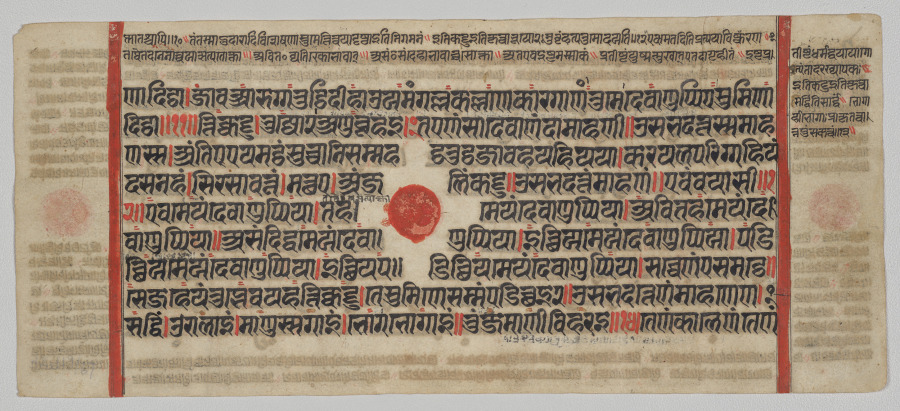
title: Text, Folio 5 (recto), from a Kalpa-sutra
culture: Western India, Gujarat, last quarter of the 15th century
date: c. 1475–1500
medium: Gum tempera, ink, and gold on paper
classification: Painting